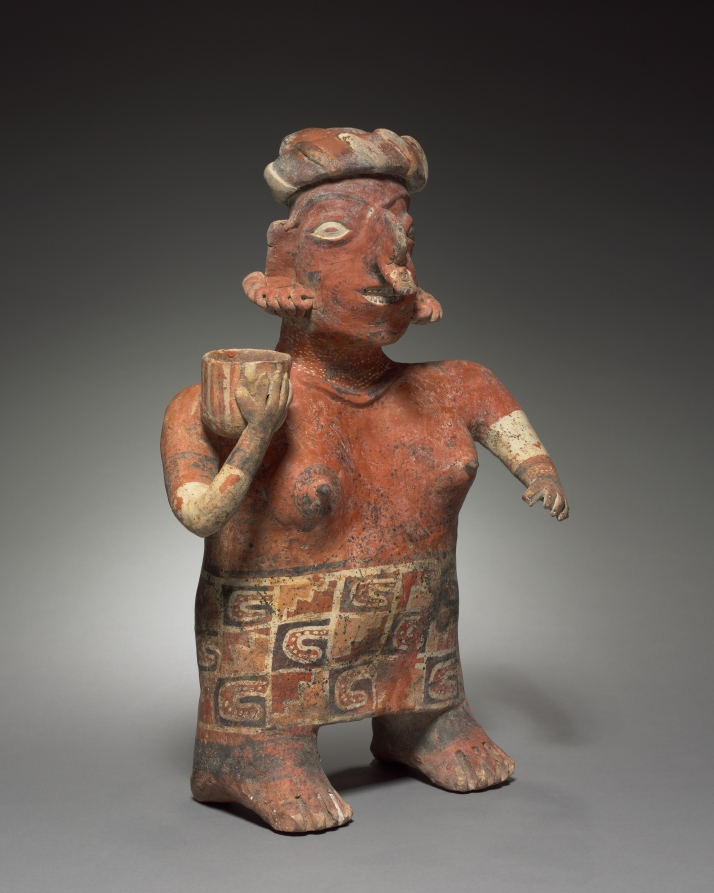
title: Standing Female Figure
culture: Mexico, Nayarit, Ixtlan del Rio style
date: c. 100 BCE–300 CE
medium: earthenware with colored slips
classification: Sculpture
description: Nagarit ceramic sculputres, like those of Colima, were manufactured for burial with the dead. The popular male-female couples may be portraits of the individuals with whom they were buried. This female figure, dressed in a colorful skirt and hat, has painted or tattooed patterns on her torso and face. Jewelry adorns her face, ears, and nose. The vessel on her shoulder symbolizes her domestic duties.